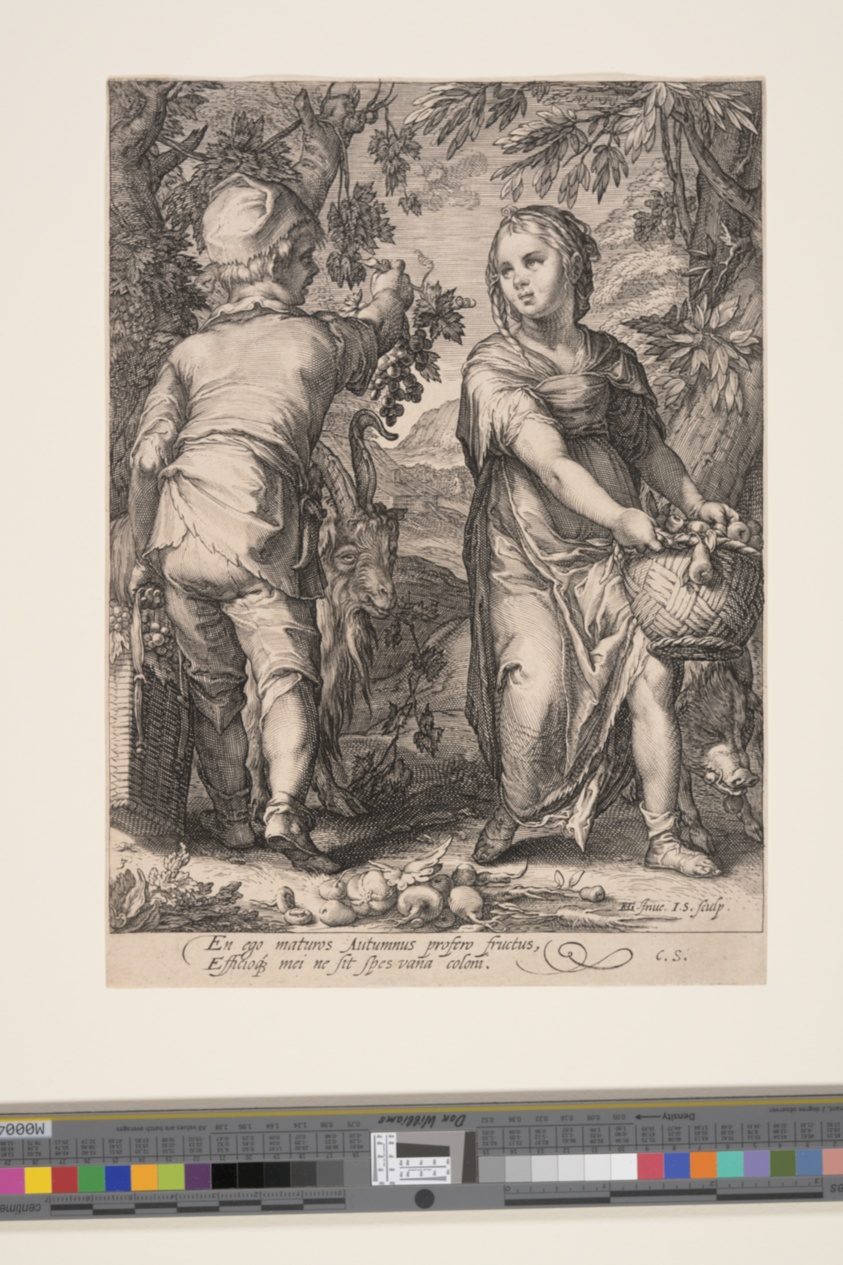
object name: Print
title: Autumn (Boy and Girl Harvesting Fruit), from The Four Seasons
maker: Jan Saenredam (Dutch, 1565–1607); after Hendrick Goltzius (Dutch, 1558–1617)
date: 1601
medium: Engraving on laid paper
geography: Netherlands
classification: print; engraving; paper; prints and drawing